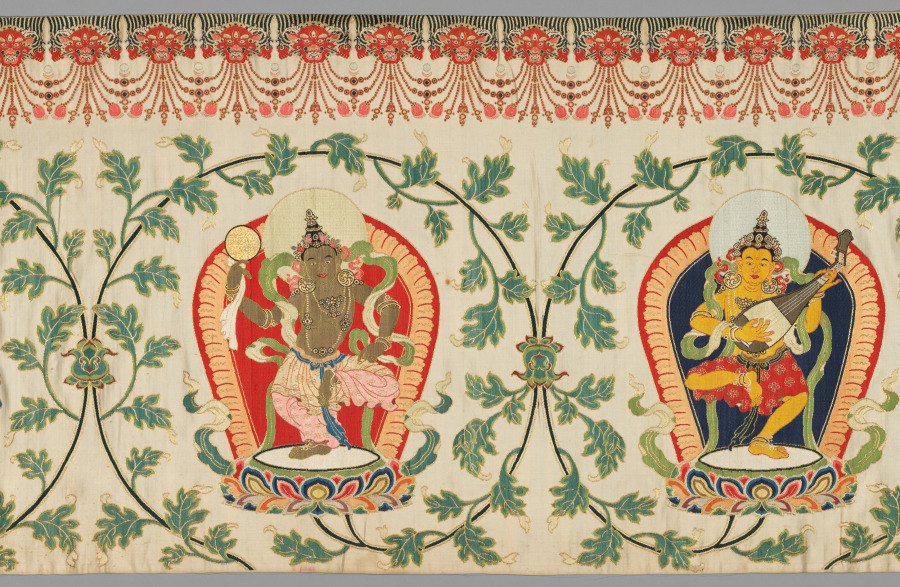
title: Brocaded Strip, known as "Imperial Tribute Brocade"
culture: China, Qing dynasty (1644-1911)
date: c. 1770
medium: brocaded satin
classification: Textile